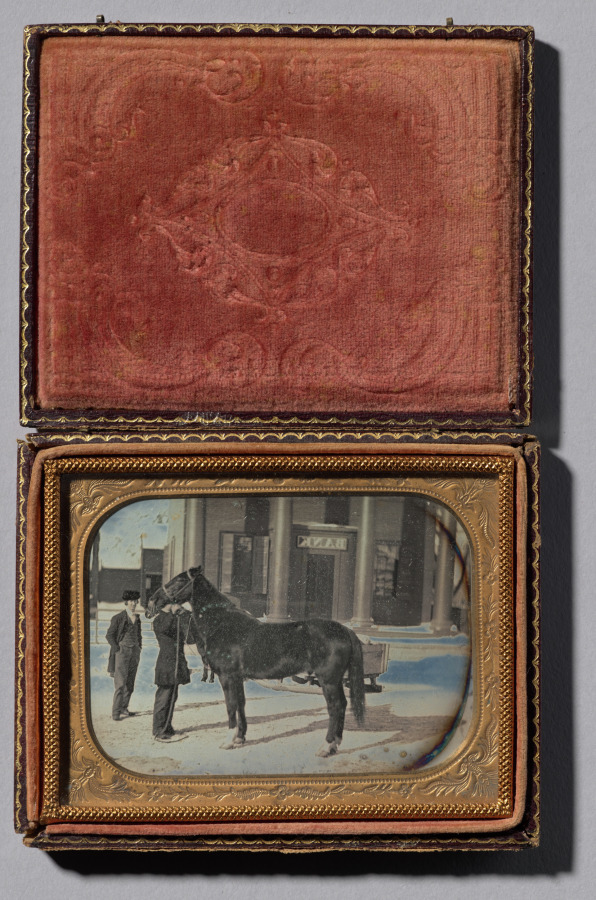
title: Prize Horse in winter, Chemung County, New York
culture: America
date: c. 1852–56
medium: daguerreotype, quarter plate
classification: Photograph